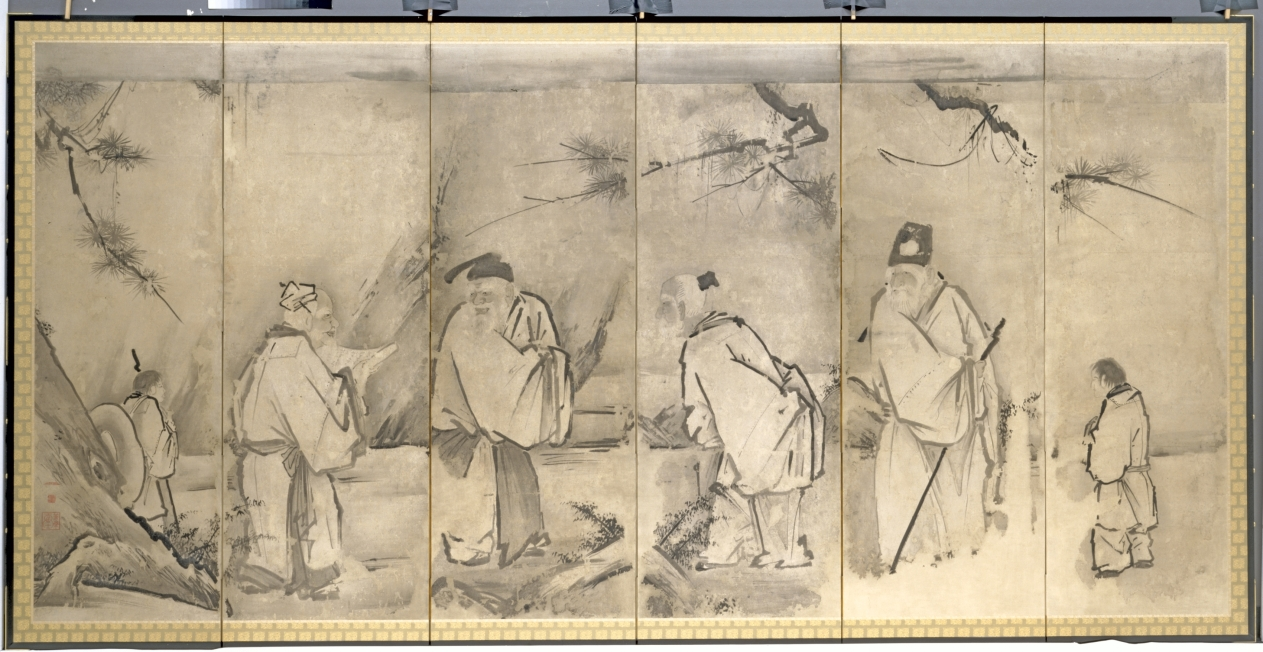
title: Four Elders of Mt. Shang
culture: Japan, Edo period (1615–1868)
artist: Kano Tan’yū (Japanese, 1602–1674)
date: 1600s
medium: pair of six-fold screens; ink on paper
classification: Painting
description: The Kano school was a group of professional artists patronized by the shogun from the late Muromachi period to the Edo period. The group adopted themes of reclusiveness to convey the importance of loyalty to the shogunate. A leader of the Edo Kano school, Kano Tanyu paired Seven Sages of the Bamboo Grove and Four Elders of Mt. Shang to reference a painting of the same theme attributed to Kano Motonobu. Seven Sages of the Bamboo Grove refers to the elites who escaped the social chaos of China’s Wei-Jin period (AD 200s–400s); they fled to a secluded bamboo grove where they could express themselves freely, enjoying pure conversation, music, and wine. The other screen, Four Elders of Mt. Shang, depicts the scholars who left the turbulence of the late Qin dynasty to pursue their scholarly interests in seclusion on Mt. Shang in Shanxi province.